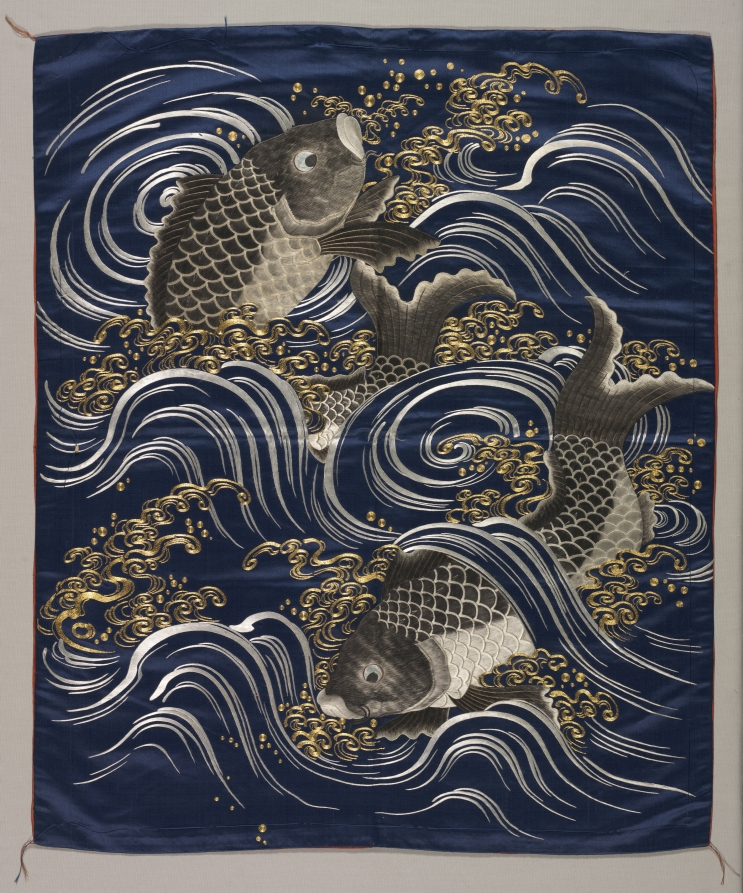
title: Gift Cover (Fukusa) with Carp in Waves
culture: Japan, Meiji period (1868–1912)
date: 1868–1912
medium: Silk: embroidered; metallic thread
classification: Embroidery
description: The motif of carp in rough water originated in China. The expression “carp jumping over the Dragon Gate” (liyu tiao longmen) refers to attaining success in life, or, historically, to passing the imperial examinations for civil service. Dragon Gate is a steep gorge of the Yellow River at Hejing in Shanxi province, and it was once said that if a carp swimming upstream could surmount the gorge, it would instantly transform into a dragon and fly into the sky. In Japan, therefore, a gift cover (fukusa) like this would have been appropriate to celebrate the recipient’s achievements.